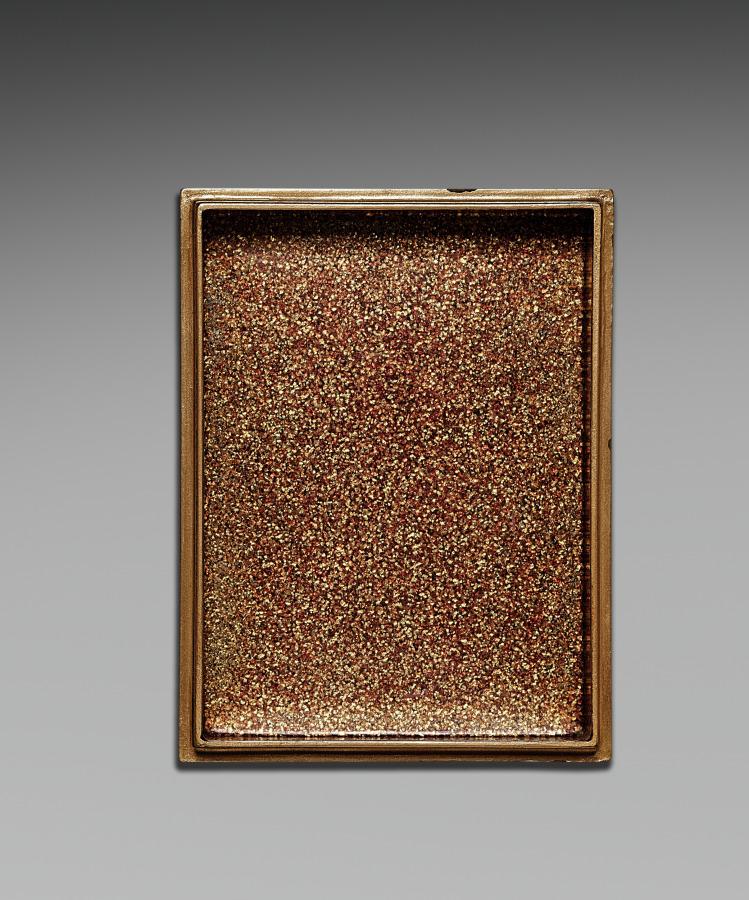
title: Nested Boxes with Chrysanthemums (inner box)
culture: Japan, Meiji period (1868–1912)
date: early 1900s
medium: lacquer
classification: Lacquer